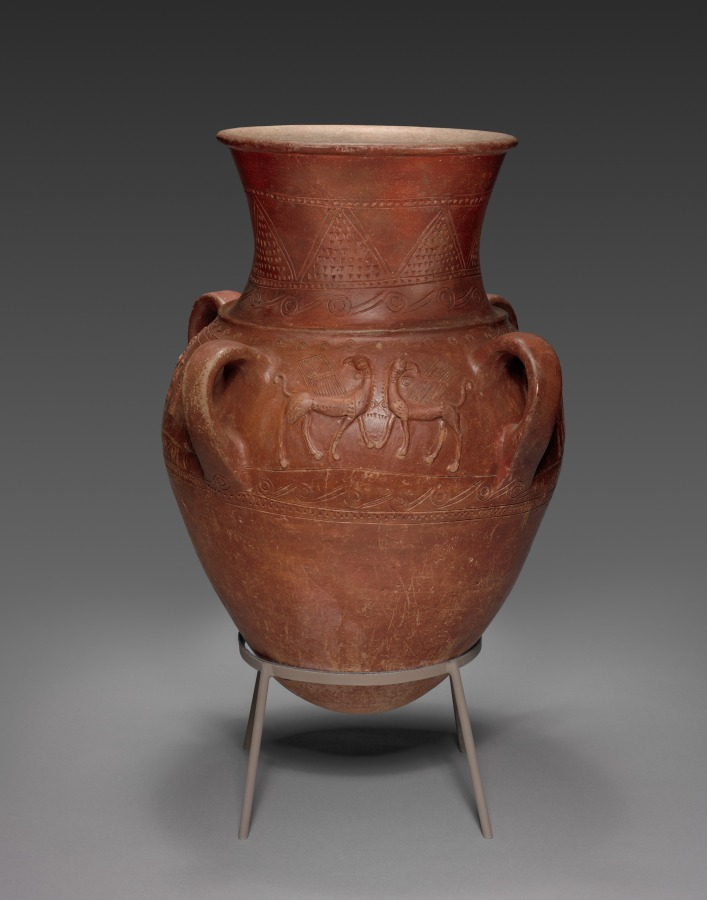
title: Hittite Vessel with Four Scenes Molded and Carved in Relief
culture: Eastern Turkey, Hittite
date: 1400–1200 BCE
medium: burnished earthenware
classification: Ceramic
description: The Hittites were a powerful people who vied with the Egyptians for control of the Near East. At times, however, alliances in the form of royal marriages were forged between the two rivals. The scene on the front of this vase shows a seated god or king holding a drinking vase in the form of a stag. Near him is a large-handled vessel in a ring stand, which illustrates how large jars such as this one were used. The standing figure is a priest pouring a liquid offering. The scene on the back of this vase shows a bow hunter using a doe with a tether as a decoy to attract a stag. Some of the hunter's arrows have already pierced the stag's hide.